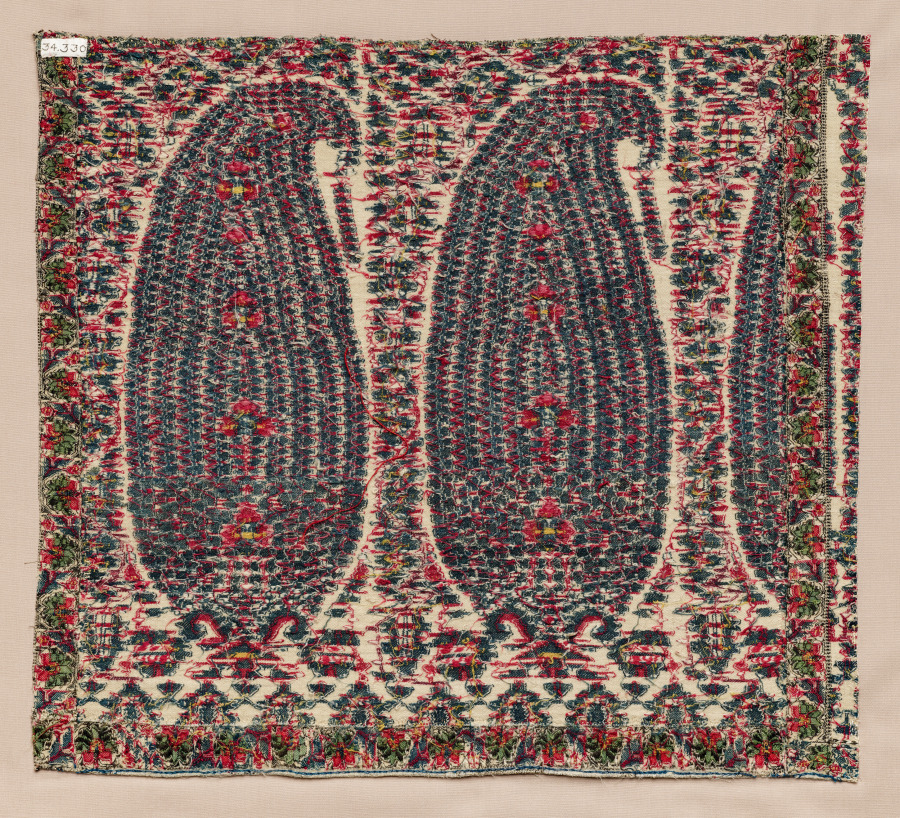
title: Fragment of a Shawl Border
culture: Kashmir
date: c. 1815–25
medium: wool and silk: tapestry twill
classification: Textile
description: Many Kashmiri textiles, even those from the early 1800s, come down to us in fragments. This shawl border was once a part of a larger piece, which could have simply been draped over the body or stitched to the hem of a garment (as many European women did). Owning and wearing such luxury textiles would have been part of indicating one’s social status. Although incomplete, this work still shows the general pattern of the larger shawl, and it retains its vibrant and hypnotizing original color. Dyes were plant-based and are liable to wash out.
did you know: Red dyes for textiles could be made from pomegranate skins.